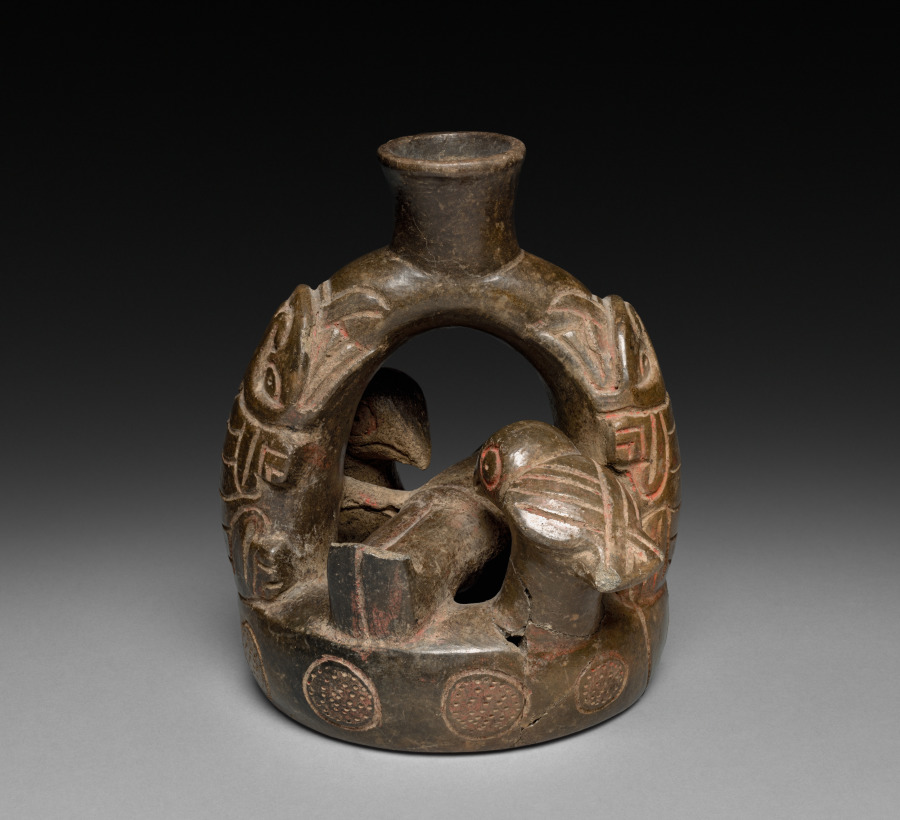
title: Vessel with Reclining Figure and Birds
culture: Andes, north coast, Cupisnique style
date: 2200–200 BCE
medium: Ceramic, pigment (cinnabar?)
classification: Ceramic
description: This ceramic vessel features a supine human being pecked by two birds that perch on the vessel’s doughnut-shaped chamber. The identity of the apparently mythical creature modeled in low relief on the sides of the stirrup-shaped spout is unknown. Little can be said about meaning beyond pointing out an obvious reference to death.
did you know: The stirrup-shaped form of the spout is common among Peruvian ceramics and unique to the ancient Americas.